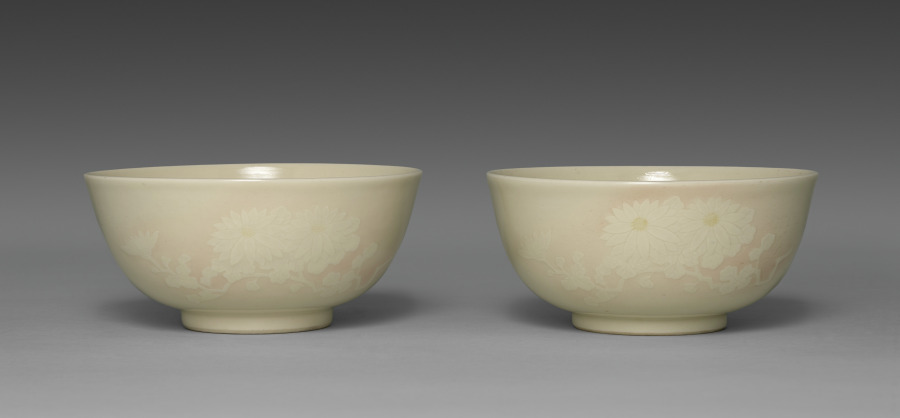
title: Sweets Bowl with Chrysanthemums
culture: Japan, Taishō period (1912–26) or Shōwa period (1926–89)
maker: Seifū Yohei IV (Japanese, 1872–1951)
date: 1914–46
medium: Porcelain with molded and carved design, underglaze color, and cream glaze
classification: Ceramic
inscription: 清風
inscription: 成山清風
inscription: 清風造 【印】 清風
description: Sweets bowls hold the confections enjoyed when drinking tea. This bowl and CMA 2022.206 offer an important lesson in appreciating Yohei IV’s ceramic practice. While they have the same design and shape and are made with the same materials, the execution of the pieces makes them entirely different after close inspection, thereby demonstrating the range of possible production results from a single template. Each bowl has the same composition of two different types of chrysanthemum flowers, one with long, slim, knifelike petals and the other with short, rounded, multilayered petals, shown running around its surface in low relief. The centers of the flowers are painted with yellow under the glaze. Yohei III formulated a number of new underglaze colors during his career, and this is likely one of them. For both bowls here, Yohei IV used his father’s kanpakuji formula, with underglaze pink for the gradated wash of color surrounding the flowers. The storage box lid provides abbreviated descriptions of the complex processes used in the surface decorations. It identifies the bowl as “Sweets dish with carved picture of chrysanthemum in kanpakuji.” The box has Yohei IV’s signature on the lid’s exterior, along with a seal reading “Seizan Seifu” 成山清風. The ink inscriptions are done in an elegant semiformal calligraphy. This bowl is more subtle and smooth in both the effect of the glaze and the execution of the relief. The designs are centered on the body between rim and foot. A closer look at the delineation of the flower petals reveals that the designs differ at times with respect to which petals appear in front or behind others. The centers of the bases of both bowls are incised with “Seifu” in a manner matching many other works by Yohei IV, although there are slight differences. As one might expect from the other differences in the bowls, the characters on the base of this subtle bowl are gentler, finishing in a tapering out of the strokes. Those on the bold bowl, CMA 2022.206, end in triangular pinheads.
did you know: This ivory and pink bowl by Seifū Yohei IV show his father’s “bright-jewel white porcelain” technique.